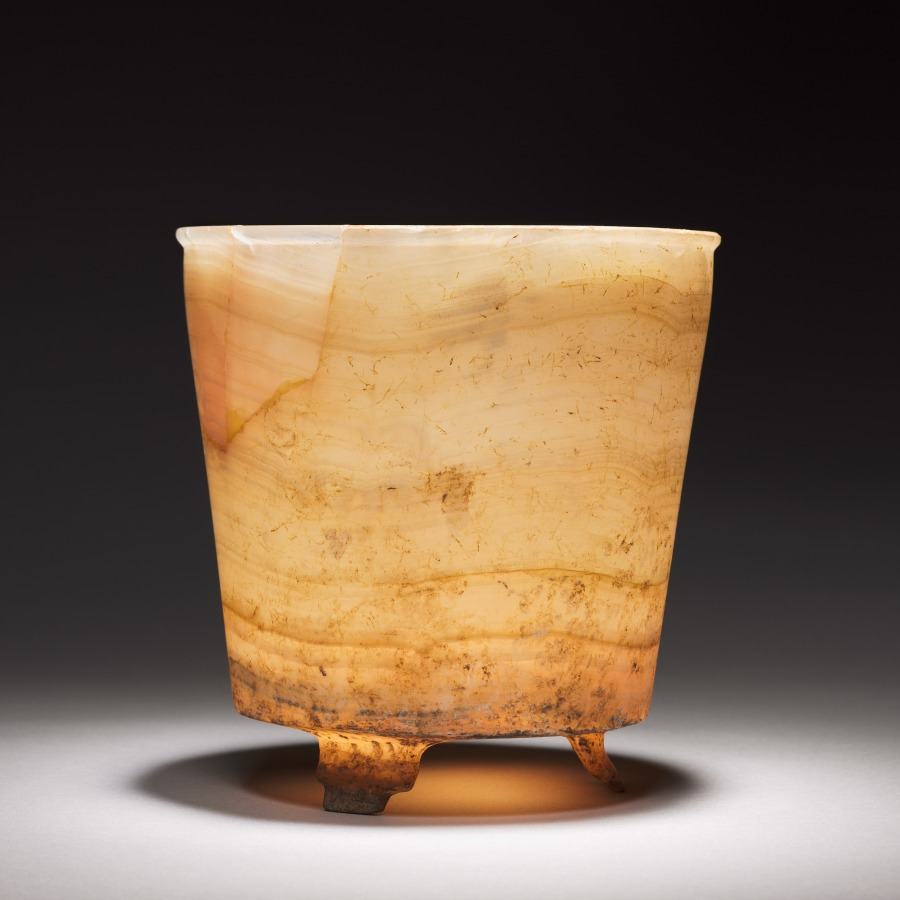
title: Offering Group: Vessel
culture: Mexico, Guerrero(?), San Jerónimo de Juárez, Xochicalco style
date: c. 800–1200(?)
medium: travertine or tecali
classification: Sculpture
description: The objects in this group, all with traces of red pigment, are said to have been found together, the shells and greenstone plaque inside the translucent stone vessel. A similar offering was found in a pyramid ornamented with feathered serpents at Xochicalco, a site south of the Valley of Mexico.